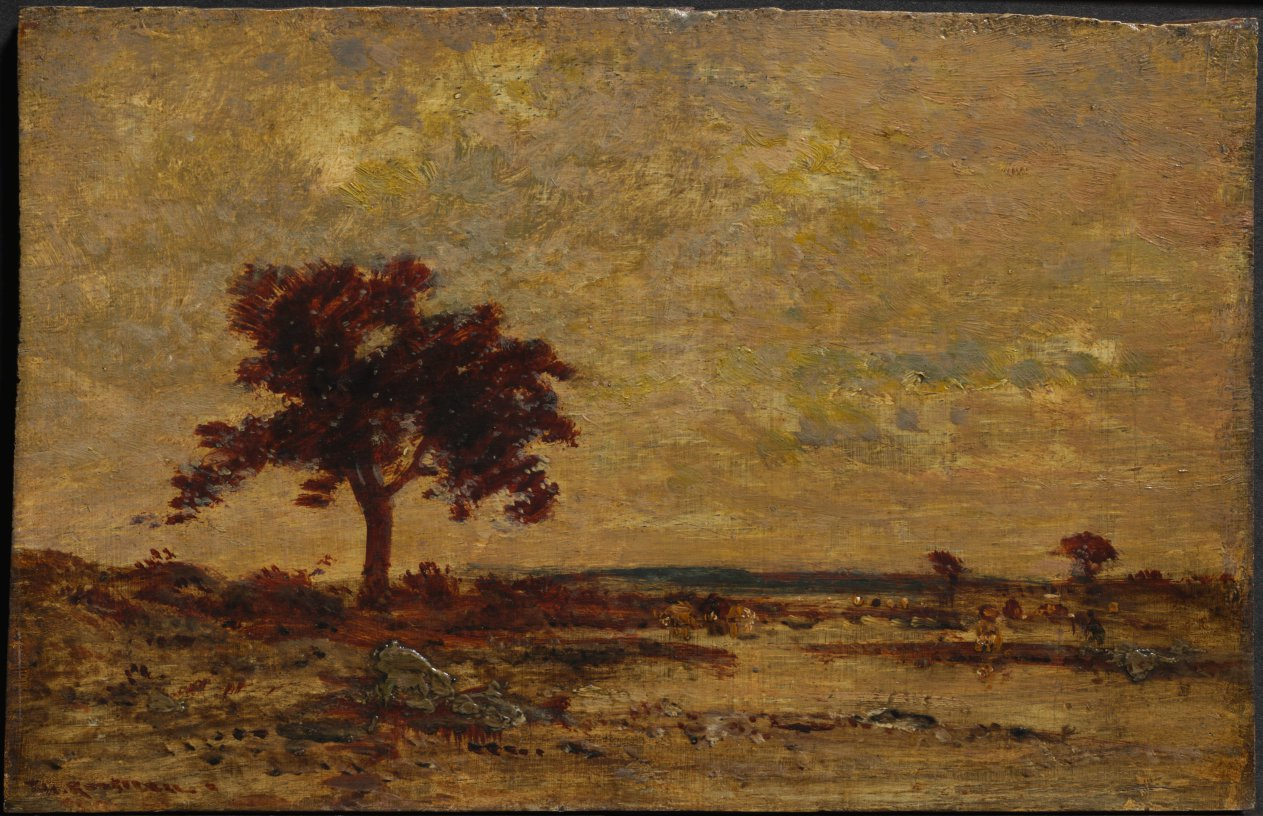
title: Marshlands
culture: France, 19th century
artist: imitator of Théodore Rousseau (French, 1812–1867)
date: not dated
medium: oil on wood panel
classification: Painting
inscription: Signed lower left: TH. Rousseau